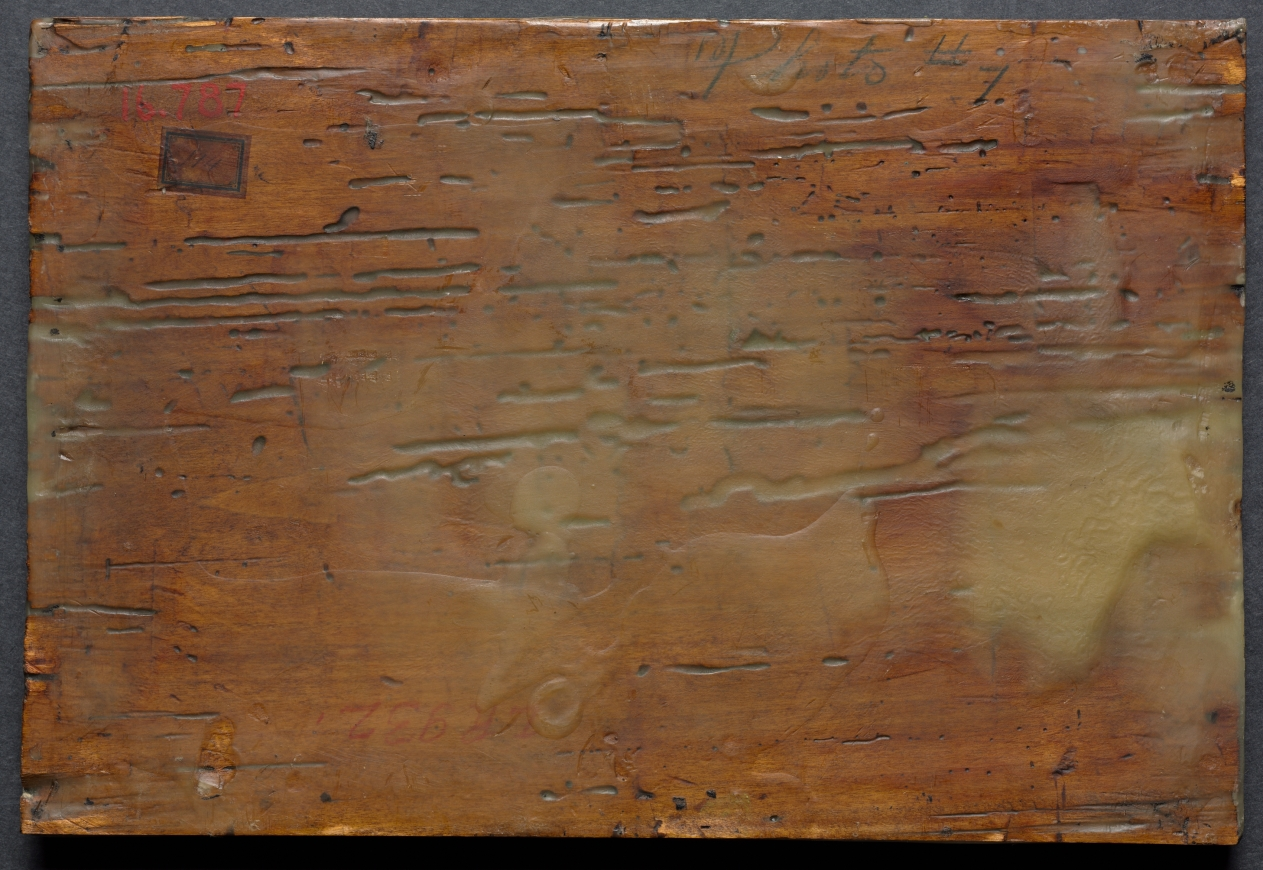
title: St. Francis of Assisi Receiving the Stigmata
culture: Italy, 15th century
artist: Bicci di Lorenzo (Italian, 1373–1452)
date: c. 1430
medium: tempera and gold on wood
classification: Painting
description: Although born into a wealthy merchant family, St. Francis (1181-1226) rejected all wordly goods, dedicating himself to chastity, humility, and selfless acts of kindness. By the time of his death, the order of friars he founded had expanded throughout Europe. In the summer of 1224, Francis visited a mountain retreat at La Verna near Assisi. After weeks of intense prayer, an angel on a cross appeared. The painter shows mystical rays of light emanating from the angel and leaving Francis with stigmata, wounds resembling those Christ suffered at the time of his crucifixion. Behind the saint, a follower throws up his hands in amazement. This predella panel, which was mounted in a row of related scenes below a larger painting, retains its original frame.